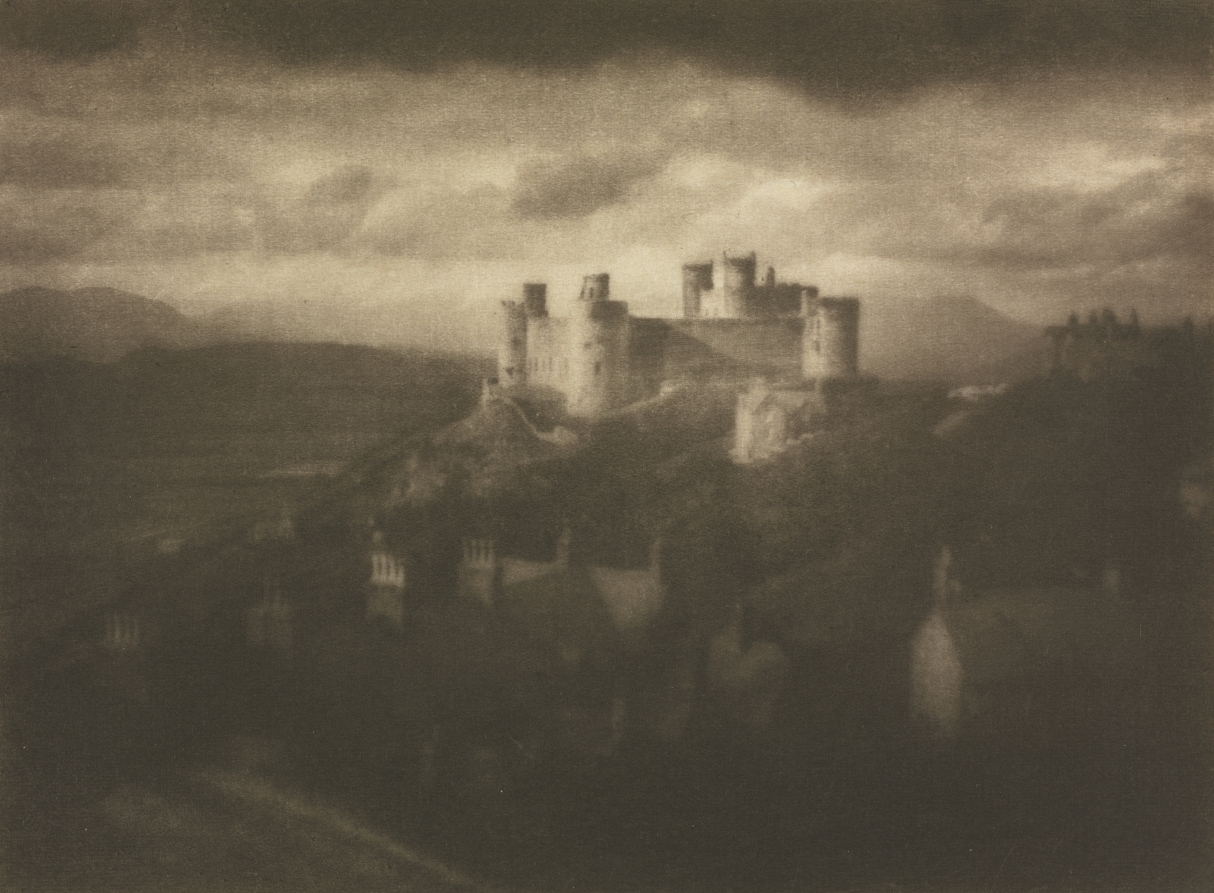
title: Camera Work: Harlech Castle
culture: England, 20th century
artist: George Davison (British, 1856–1930)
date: 1909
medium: photogravure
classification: Bound Volume